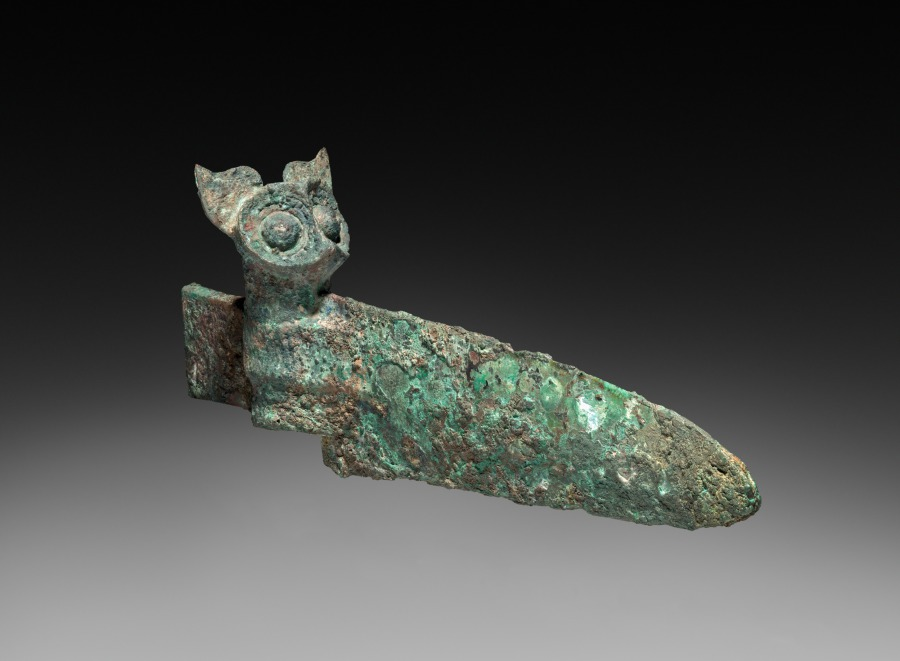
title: Axe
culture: China, Shang dynasty (c. 1600–c. 1046 BCE)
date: 1766–1045 BCE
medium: bronze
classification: Metalwork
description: The head of an owl with large eyes and ears, sitting above the blade of a halberd-axe, may have deterred evil and harm from its carrier. Whether such an axe was used in ritual or warfare is not clear.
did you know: A staff or pike would have attached to the blade via the socket below the owl's head.